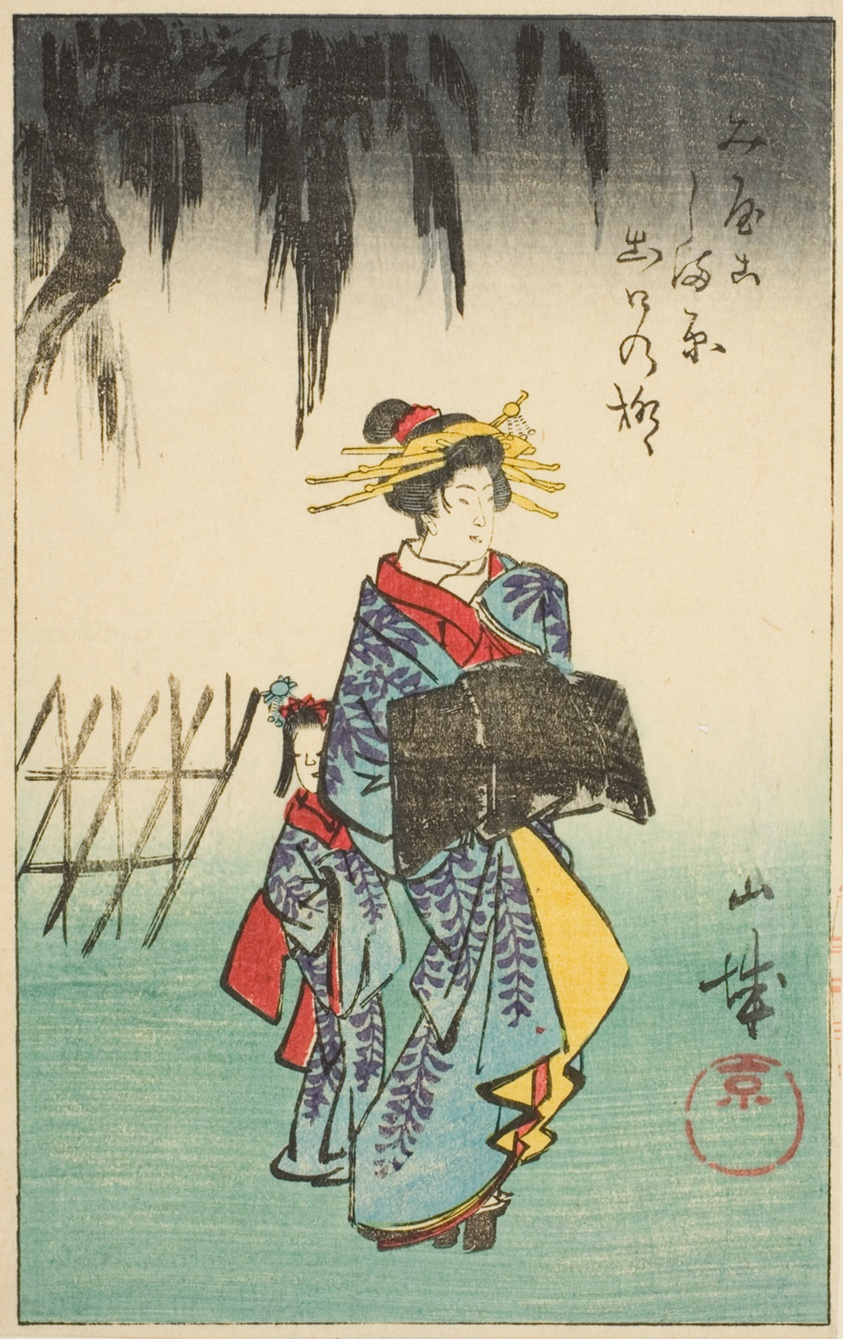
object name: Print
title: Yamashiro Province, section of sheet no. 1 from the series "Cutout Pictures of the Provinces (Kunizukushi harimaze zue)"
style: Japanese (culture or style)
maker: Utagawa Hiroshige 歌川 広重; Japanese, 1797-1858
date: 1852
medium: Color woodblock print; section of harimaze sheet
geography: Japan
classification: woodblock print; print; asian art